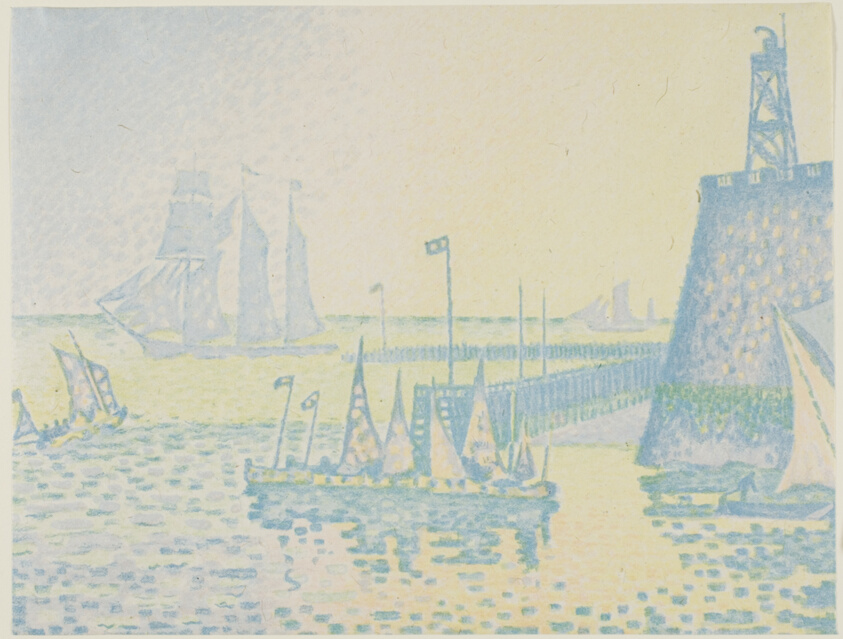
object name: Print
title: Evening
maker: Paul Signac (French, 1863-1935); printed by Auguste Clot (French, 1858-1936)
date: 1898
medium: Lithograph in five colors (light blue, blue, yellow, pink and green) on ivory wove chine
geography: France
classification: lithograph; print; prints and drawing